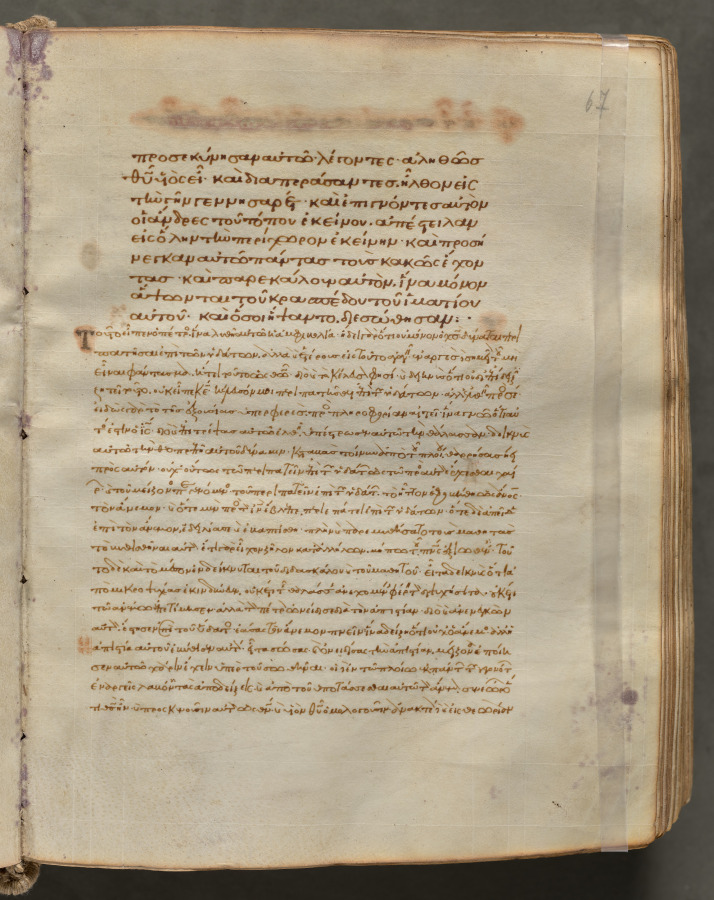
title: Text, folio 67 (recto), from a Gospel Book with Commentaries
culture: Byzantium, Constantinople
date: c. 1000–1100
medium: ink, tempera, and gold on vellum; leather binding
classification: Bound Volume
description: Each of the four gospels in this book opens on a page with brilliantly illuminated borders depicting the author of the text as well as birds-principally peacocks, symbols of the immortality of the soul-and fountains, representing the fountain of life and the salvation of the soul. This volume consists of 428 leaves with texts in Greek. Its level of sophistication suggests that it was probably written and decorated in a monastery in Constantinople.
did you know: Gospel Books were carried in procession through Byzantine churches.